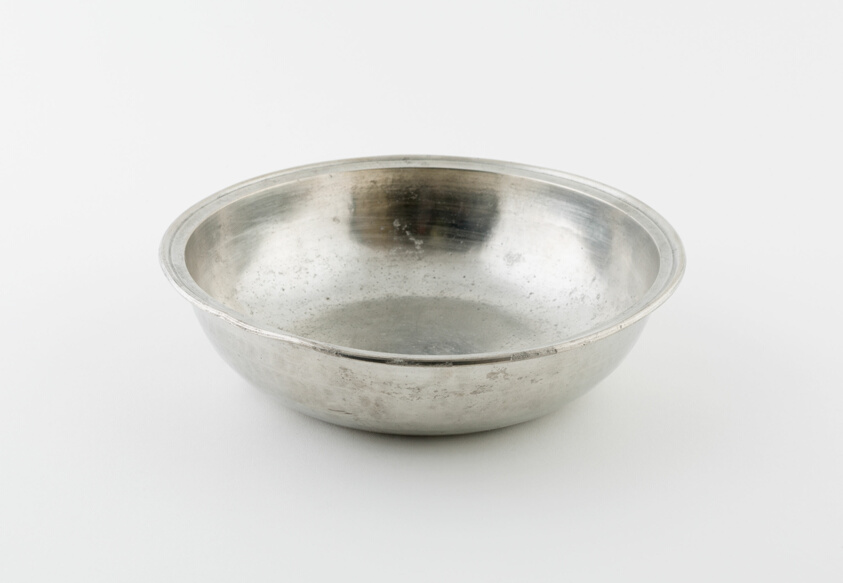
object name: Metalwork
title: Basin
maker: Thomas Compton; English, active 1775-1817; England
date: c. 1780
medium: Pewter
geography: City of London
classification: pewter; metalwork; european decorative arts